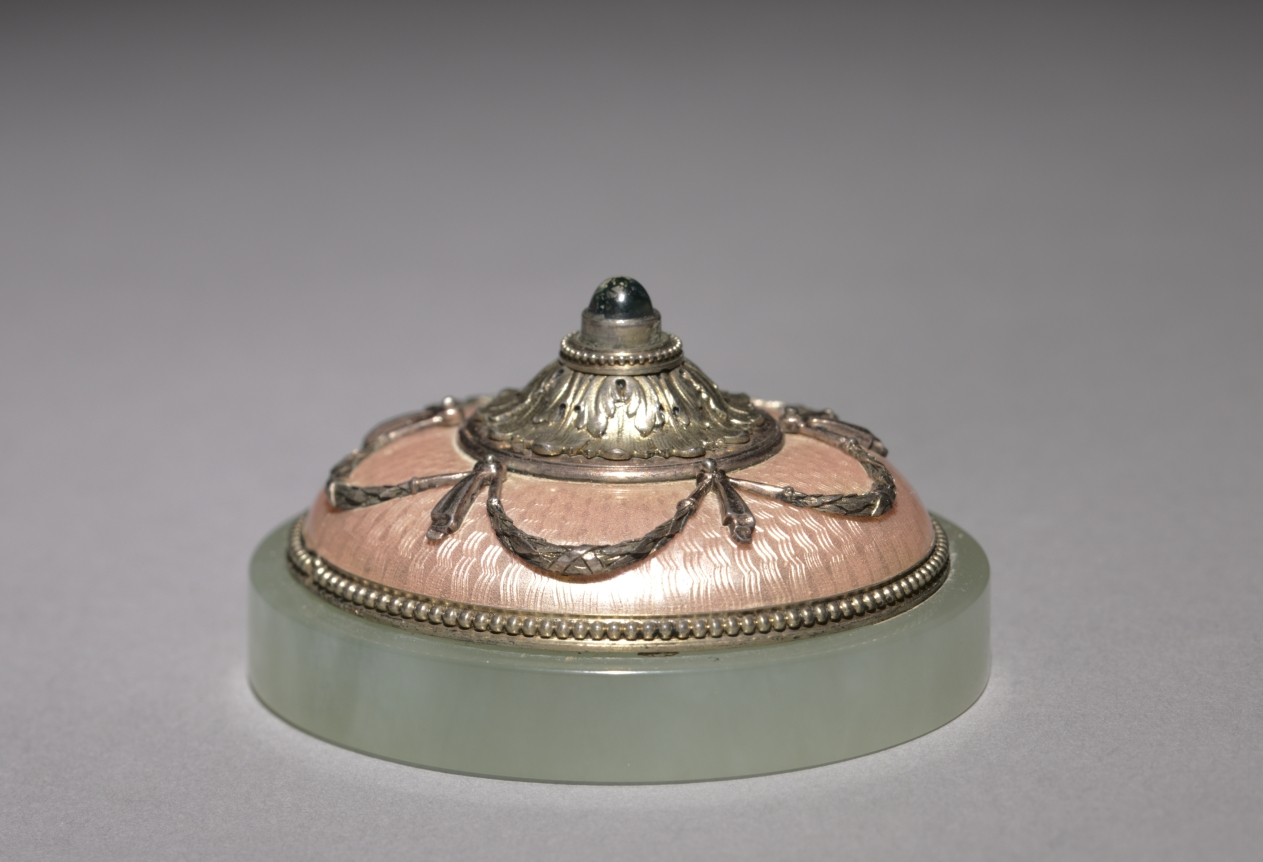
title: Bell Push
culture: Russia, St. Petersburg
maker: House of Fabergé (Russian, 1842–1918)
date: c. 1895–1915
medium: silver gilt, enamel, bowenite, cabochon sapphire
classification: Miscellaneous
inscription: 88; Fabergé (in Cyrillic); another illegible mark.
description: This bell push sat on a dressing table in a wealthy household to summon a servant during the Gilded Age around 1900. Life "below stairs" wasn't as easy as movies and television have portrayed it. Servants could be summoned at all hours of the day and night, interrupting their work, and causing disruption at the whim of the wealthy owners or their guests. The House of Fabergé became the most celebrated Russian supplier of such luxury goods as servant bell pushes. As court jeweler to the Russian imperial family, the Fabergé firm created jewels and luxurious accessories both for the tsar and the Russian state as well as other European royalty and aristocrats.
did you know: The advent of electricity in the 1880s made systems of buttons and bell pushes to call servants more efficient than the old lever and pully system within the wall that often broke with a vigorous tug.